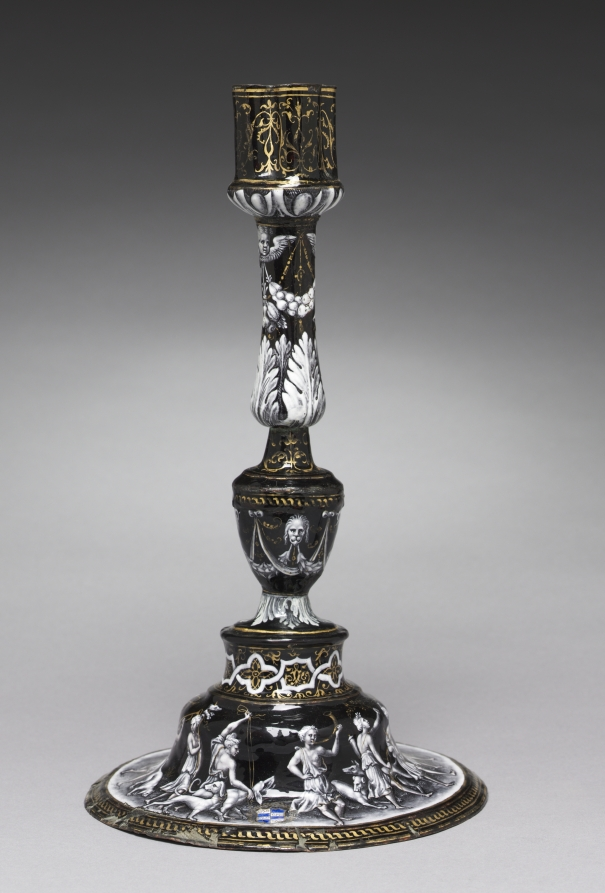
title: Candlestick Depicting the Triumph of Diana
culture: France, Limoges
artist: attributed to Jean II de Court (French, before 1583)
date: c. 1565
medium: painted enamel (grisaille) on copper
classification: Enamel